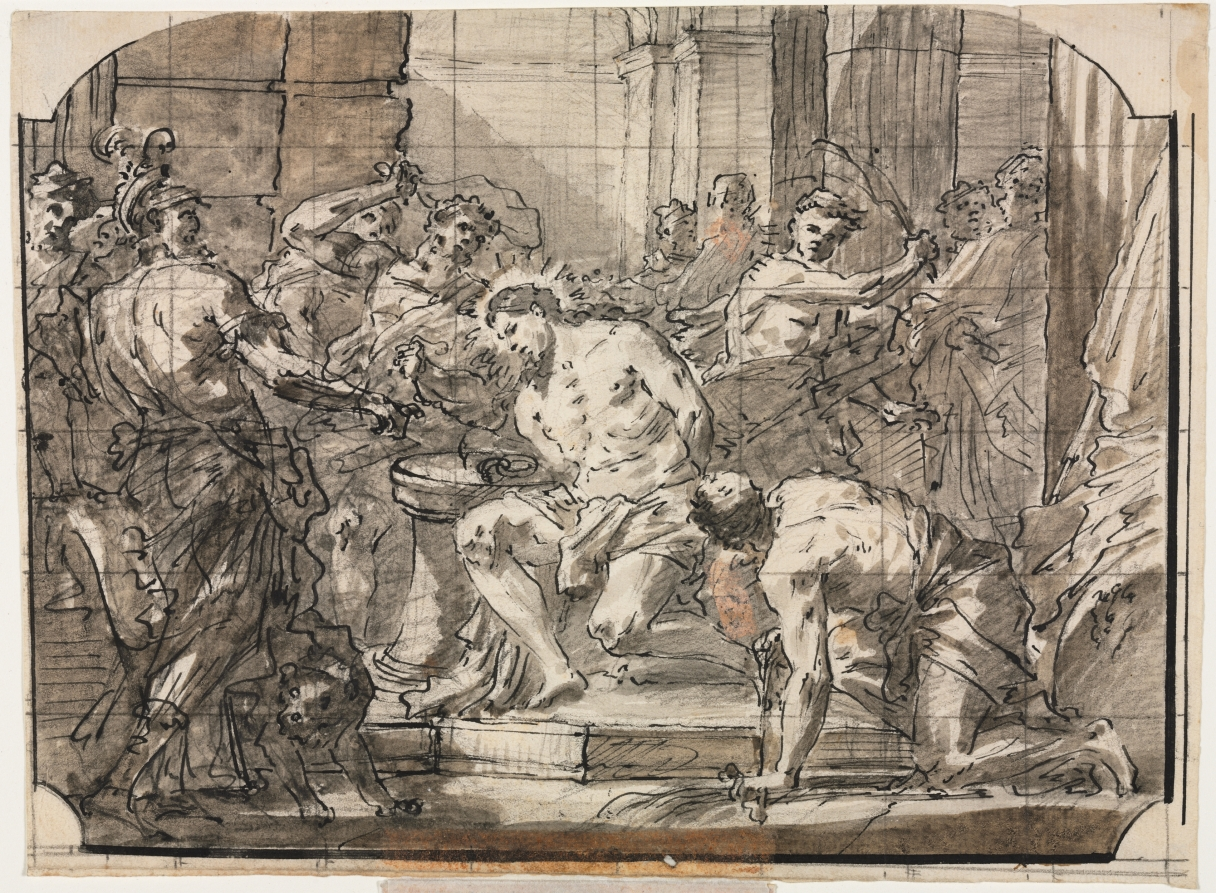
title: Flagellation of Christ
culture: Italy, 18th century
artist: Gaspare Diziani (Italian, 1689–1767)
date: c. 1750–55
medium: pen and black ink, black chalk, and brush and gray wash, with brush and brown wash; squared in graphite; framing lines in black chalk and pen and black ink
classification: Drawing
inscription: VERSO, upper right, in graphite: SIX [L?]E [sideways]